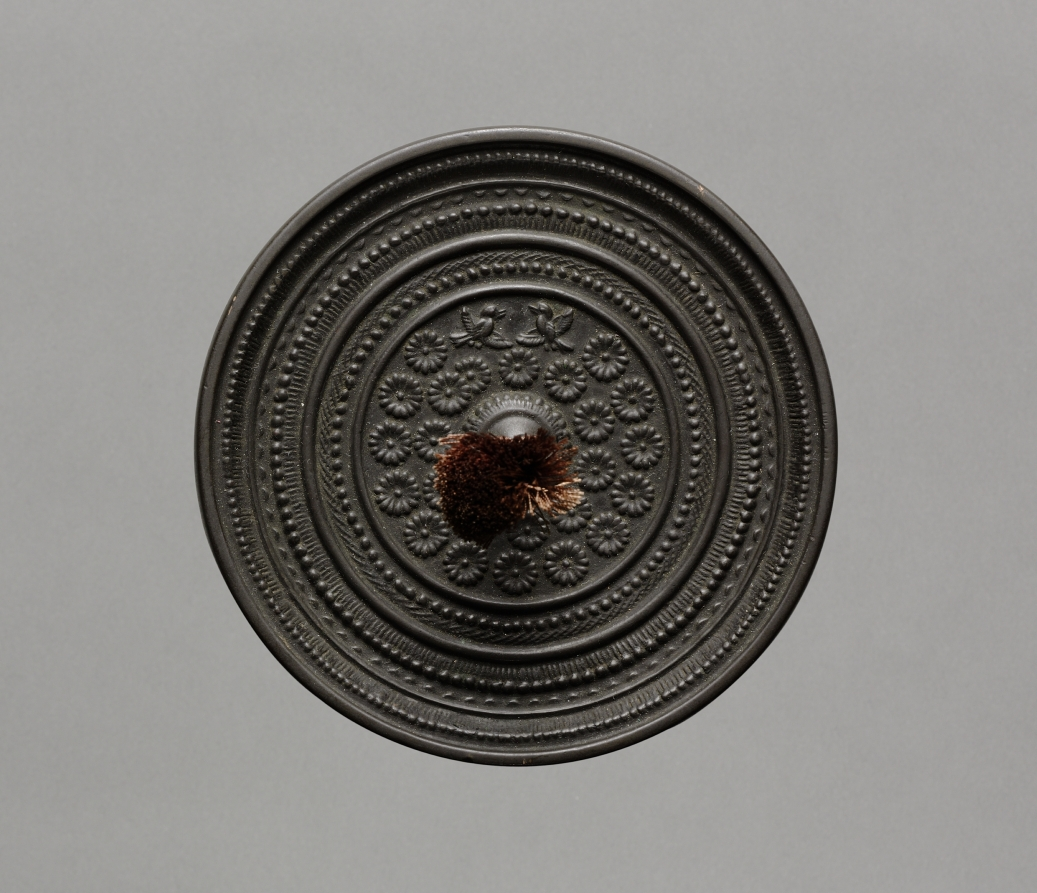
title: Mirror with Pair of Birds and Chrysanthemum Pattern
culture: Japan, Muromachi period (1392–1573)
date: 1392–1573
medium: bronze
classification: Metalwork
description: The Japanese used chrysanthemums as decorative elements on mirrors. In the Heian period, a chrysanthemum with cranes or long-tailed birds was a common motif. Later, in the Kamakura and Muromachi periods, chrysanthemum designs were divided into three patterns with different symbolic associations: Chrysanthemum with Cranes represented longevity; Water Flowing suggested longevity as well as the Noh drama Kikujido, or Chrysanthemum Boy; and East Fence alluded to the poem "Drinking Wine" by Tao Yuanming (AD 365-427). Here, the mirror featuring Buddhist iconography (kyojo) and a chrysanthemum design on the back shows that the flower was also appreciated in the context of Buddhism in the Kamakura period.